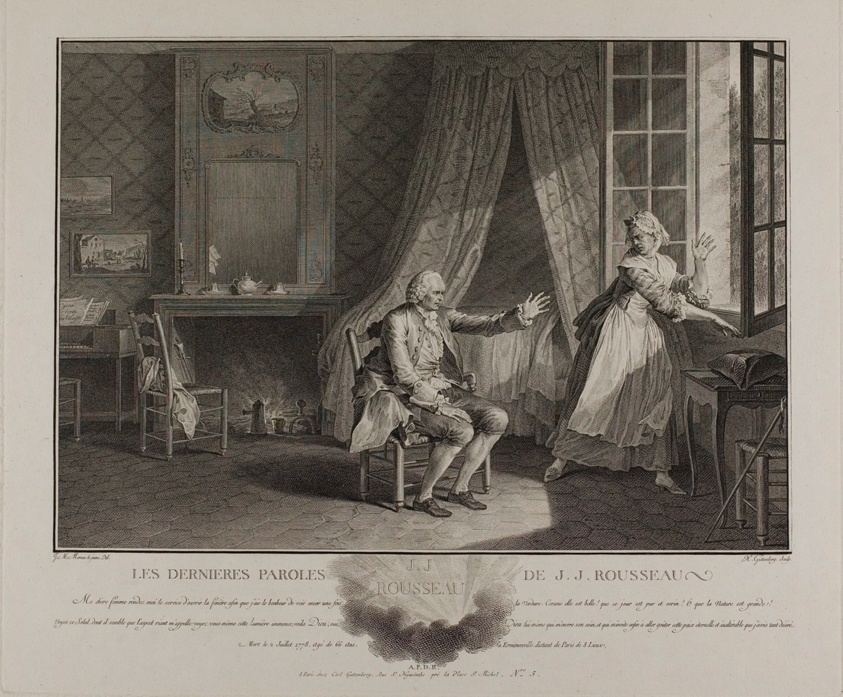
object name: Print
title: The Last Words of Jean Jacques Rousseau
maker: Heinrich Guttenberg (German, 1749-1818); after Jean Michel Moreau (French, 1741-1814)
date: 1775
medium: Engraving on laid paper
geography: Germany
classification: engraving; print; prints and drawing